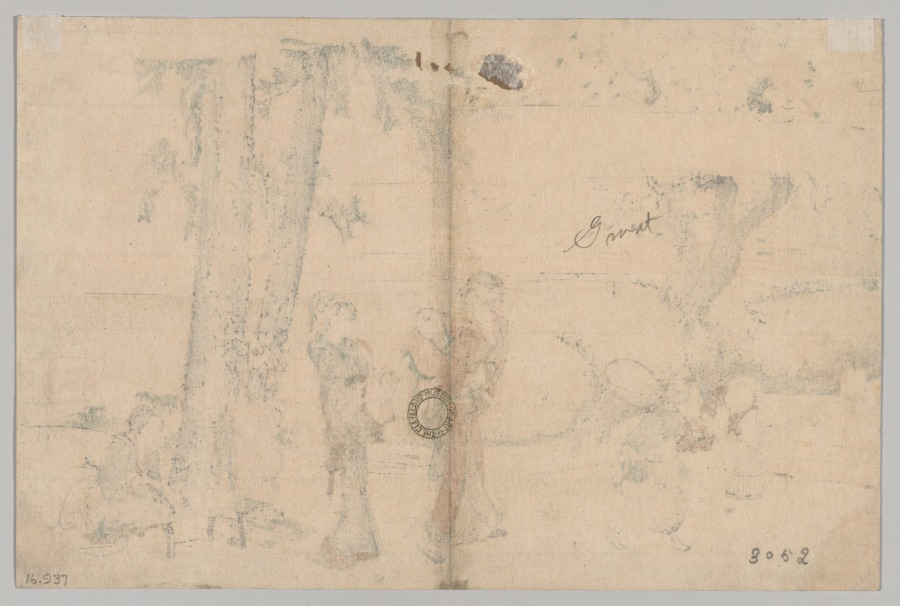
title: Group of Figures near a Brook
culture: Japan, Edo period (1615–1868)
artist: Katsushika Hokusai (Japanese, 1760–1849)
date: 1760–1849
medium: color woodblock print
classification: Print